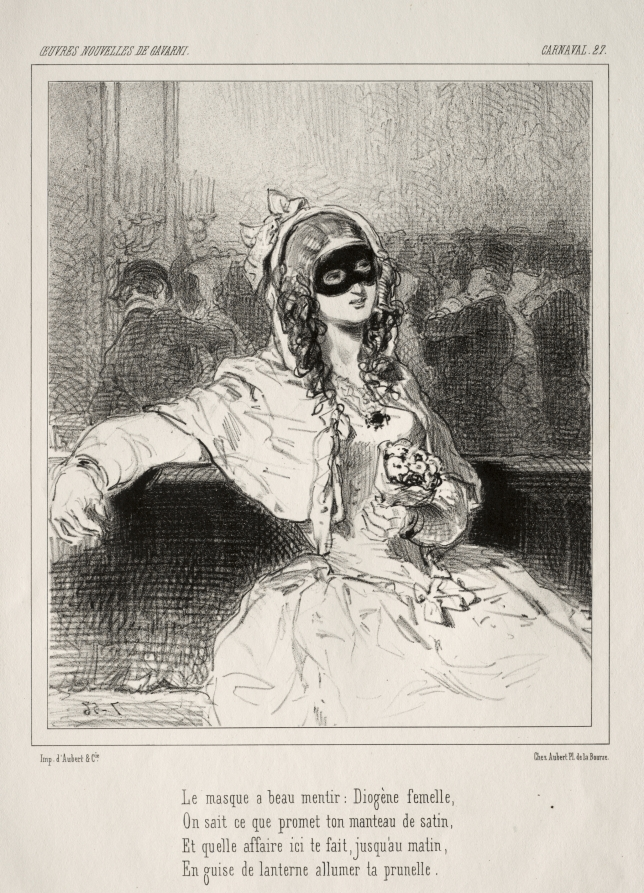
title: Carnaval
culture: France, 19th century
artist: Paul Gavarni (French, 1804–1866)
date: c. 1841–47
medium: lithograph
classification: Print